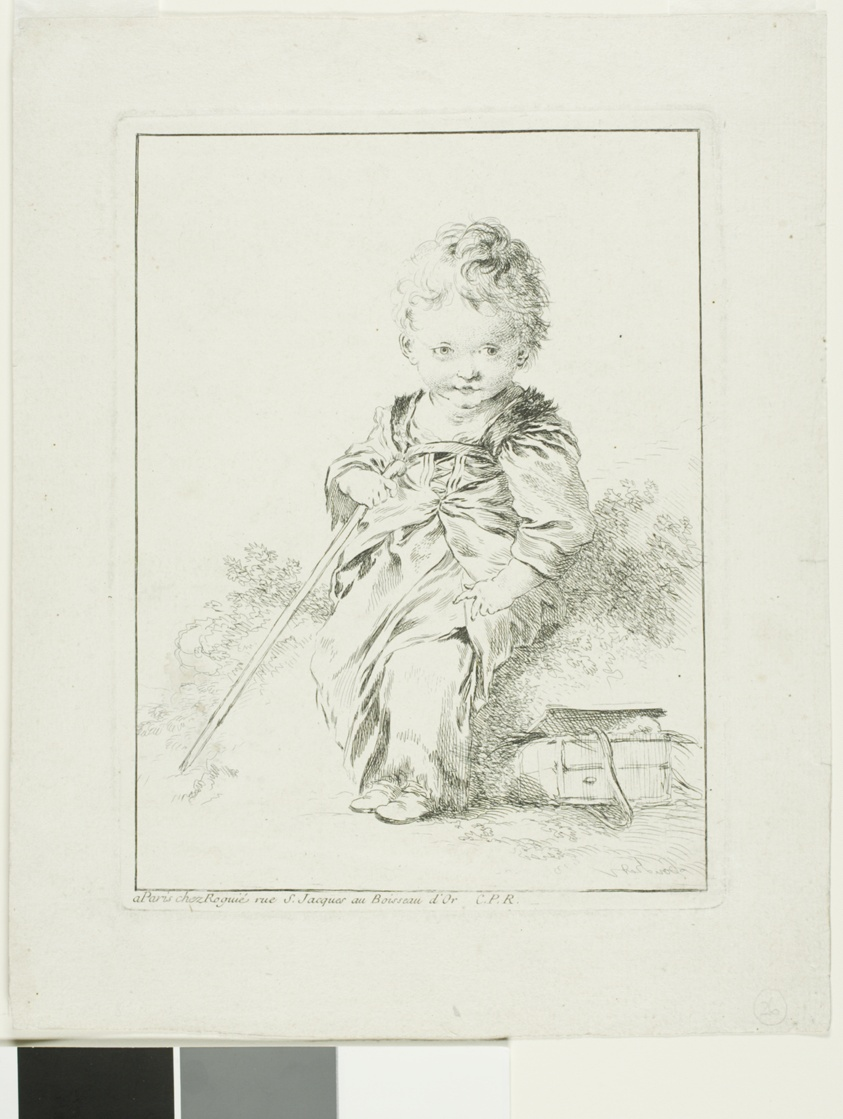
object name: Print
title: The Little Savoyard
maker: François Boucher (French, 1703-1770)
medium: Etching on off-white laid paper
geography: France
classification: etching; print; prints and drawing